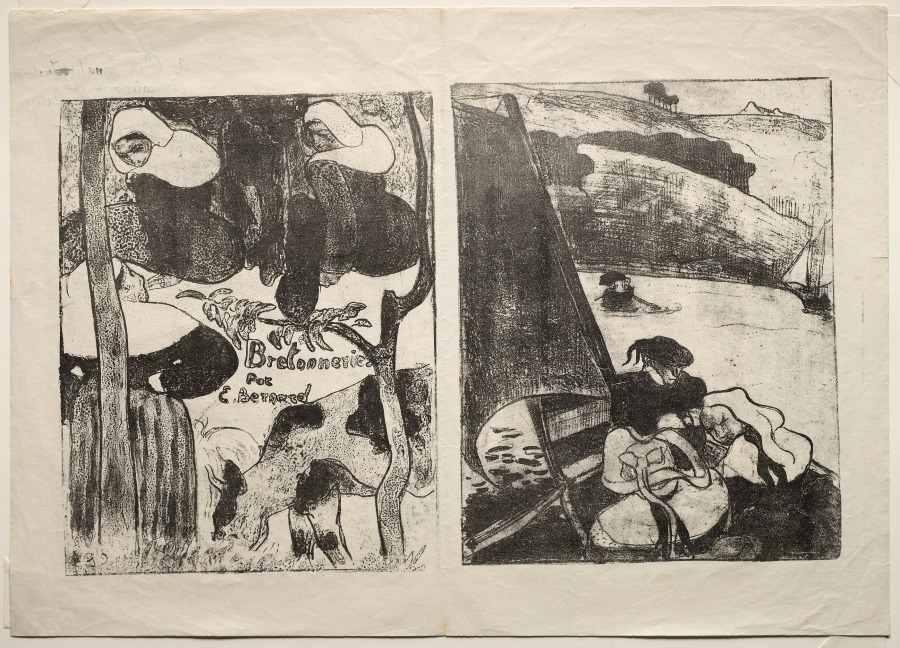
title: Les Bretonneries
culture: France, 19th century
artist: Émile Bernard (French, 1868–1941)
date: 1889, printed 1896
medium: zincograph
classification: Print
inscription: inscribed on verso of title page: A Don Ignatio Zuloago/ Amicalement et/ avec Grattitude artistique/ Emile Bernard/ Seville 1897